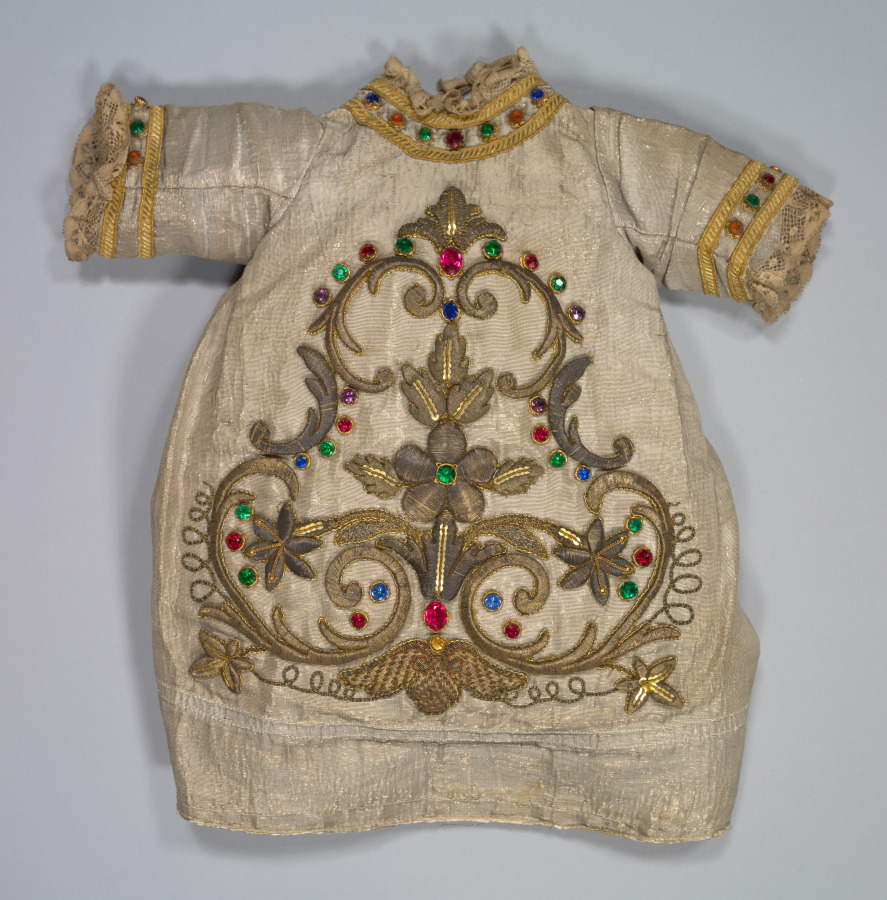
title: Baby's Robe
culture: Spain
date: 1600s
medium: plain weave silk with silver metal thread weft; embroidered with gold and silver metal thread, spangles, and colored glass stones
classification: Garment